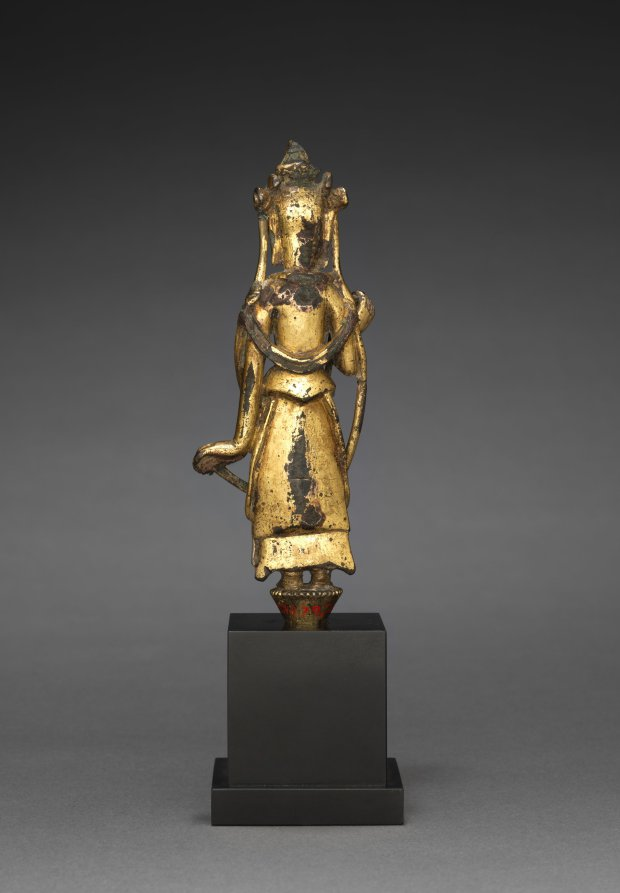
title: Standing Bodhisattva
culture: China, Sui dynasty (581-618)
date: late 500s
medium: gilt bronze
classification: Sculpture